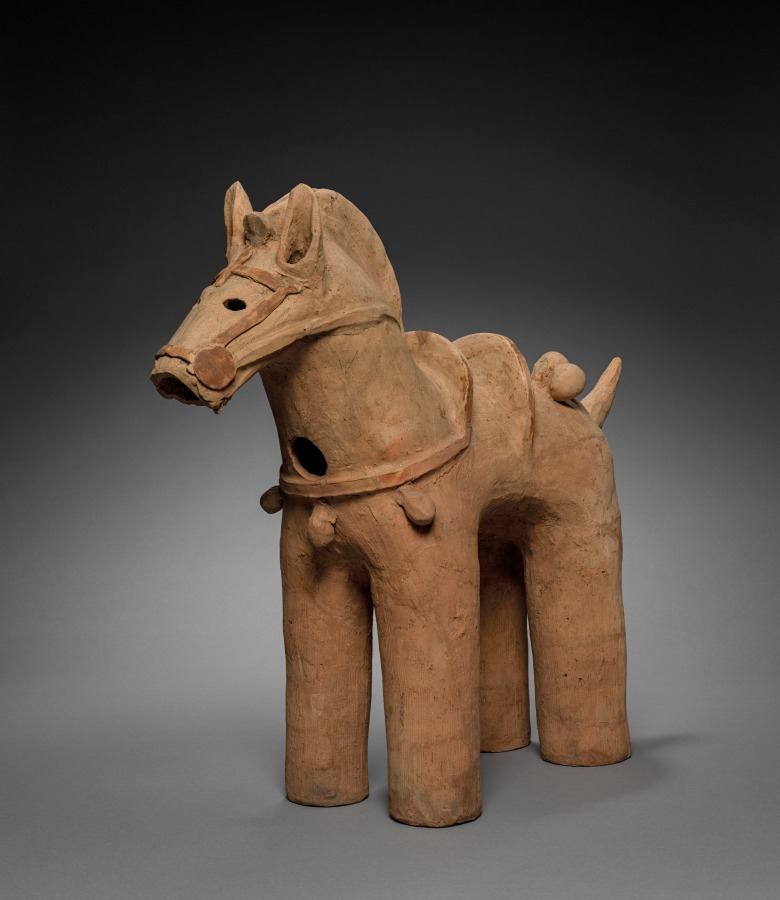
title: Haniwa Horse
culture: Japan, Kofun period (300–710 CE)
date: 400s–500s CE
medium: earthenware with traces of pigment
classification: Sculpture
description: This horse’s tack, with its round bells, resembles saddlery in fashion in Korea during the 400s–500s CE. Concurrent with mass migration from the Korean Peninsula, tombs covered with large earthen mounds similar to those on the Asian continent began to appear in Japan around the year 300 CE. Called “old mounds” (kofun), their surfaces were covered with hollow clay cylinders (haniwa). Sculptures of animals, buildings, and finally human figures followed, developing over the ensuing three centuries.